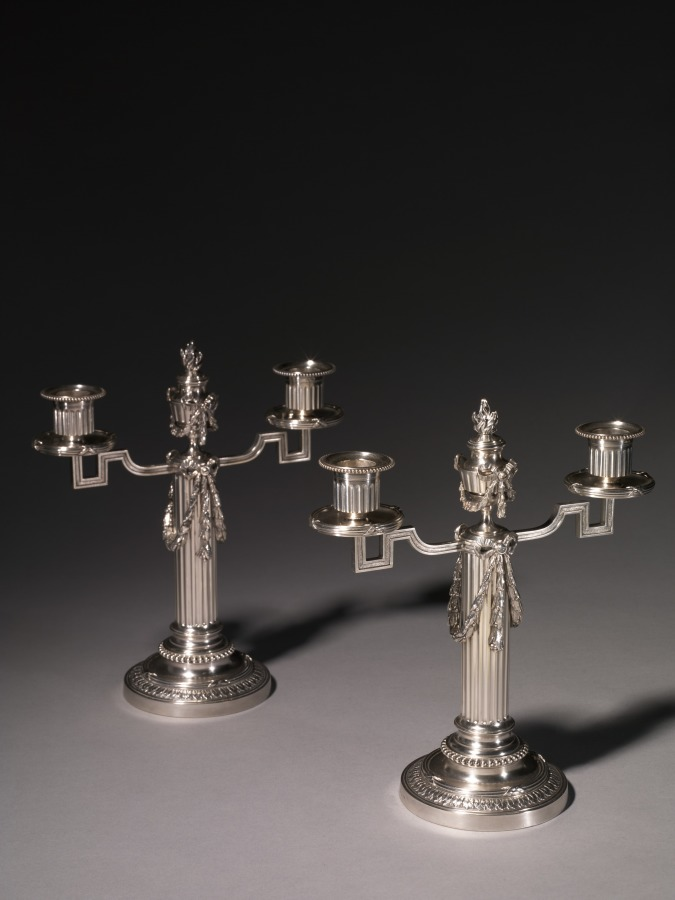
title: Pair of Candelabra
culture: Russia, St. Petersburg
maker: House of Fabergé (Russian, 1842–1918)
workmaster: Julius Alexandrovitch Rappoport (Russian, 1864–1916)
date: 1887–90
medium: silver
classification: Silver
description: This pair of candelabra demonstrates Fabergé’s commitment to a commercial balance between decorative and functional design. The pair was made by Fabergé’s chief silversmith, German-born Julius Rappoport, in Moscow, where the majority of gold and silver objects were crafted. Small in size, the pair may have been used in more intimate settings, as opposed to larger banquets or public gathering areas.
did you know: The design reflects the resurgence of the neoclassical style in the late 1800s.